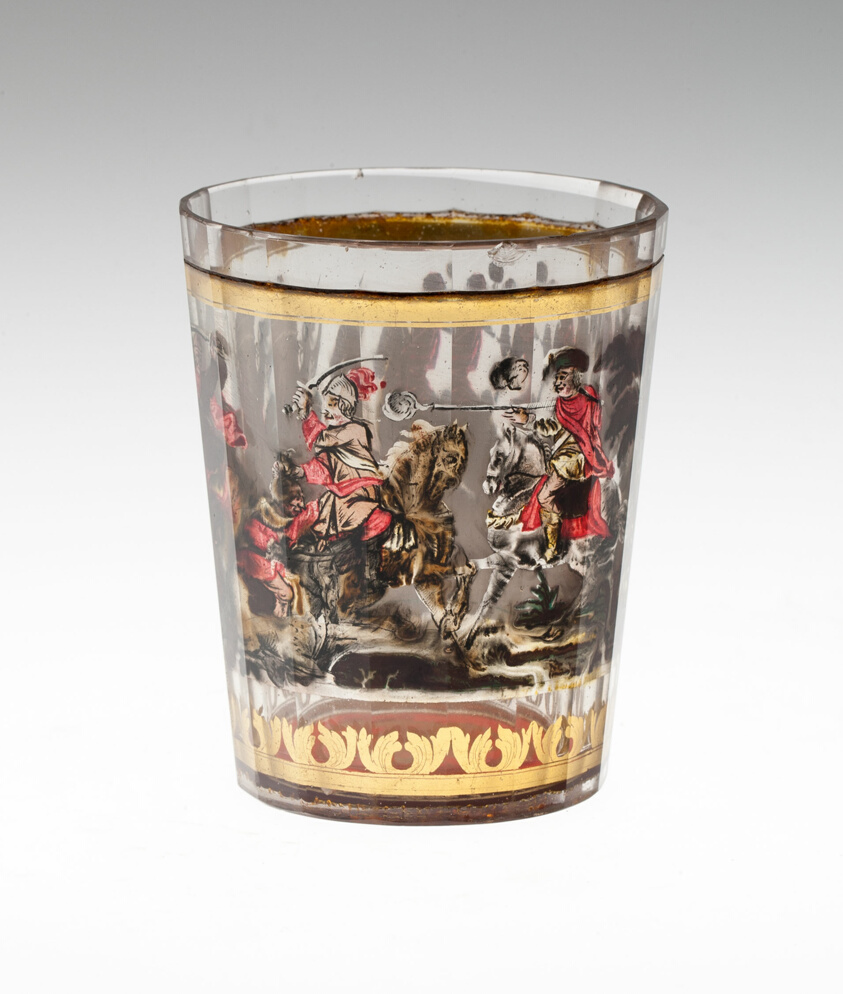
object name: Glass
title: Beaker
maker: Bohemia, Czech Republic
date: c. 1730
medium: Glass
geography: Bohemia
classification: drinking vessel; glass; european decorative arts